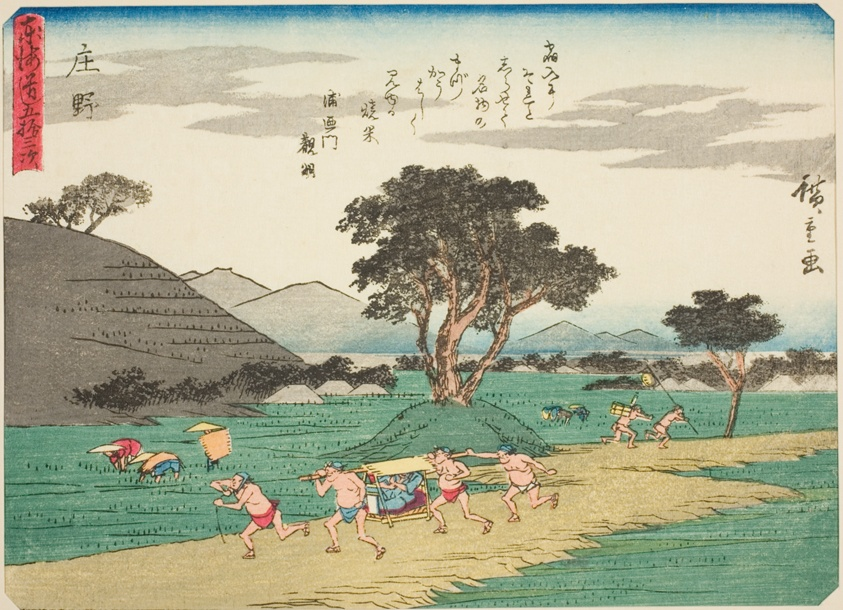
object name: Print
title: Shono, from the series "Fifty-three Stations of the Tokaido (Tokaido gojusan tsugi)," also known as the Tokaido with Poem (Kyoka iri Tokaido)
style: Japanese (culture or style)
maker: Utagawa Hiroshige 歌川 広重; Japanese, 1797-1858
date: c. 1837/42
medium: Color woodblock print; chuban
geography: Japan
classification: print; asian art